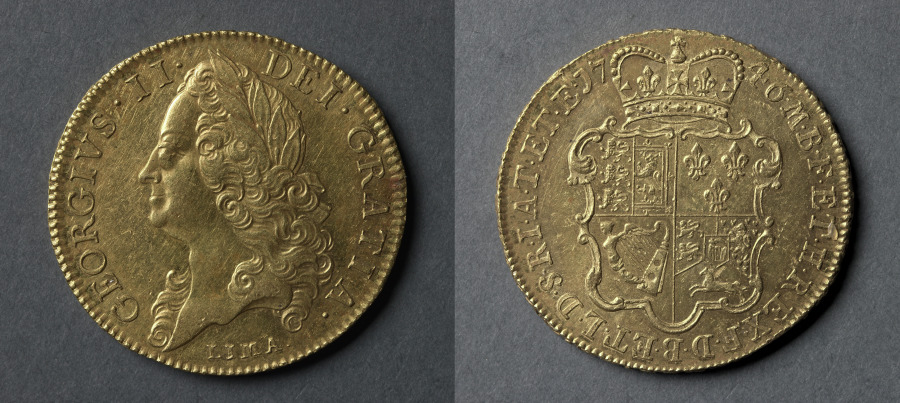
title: Five Guineas: George II (obverse); Shield of Arms (reverse)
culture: England, George II, 1727-1760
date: 1746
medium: gold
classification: Coins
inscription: DEI . GRATIA . GEORGIVS . II; below: LIMA.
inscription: M·B·F·ET·H·REX·F·D·B·ET·L·D·S·R·I·A·T·ET·E·17 46·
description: A new bust now appears on the coinage showing the king as an older man. The word LIMA that appears below the bust on this year only, refers to bullion captured by Admiral Anson from a Spanish plate fleet at Manila during his circumnavigation of the globe (1739–43). It also probably includes bullion supplied by a number of privateers operating against the Spanish plate fleets in the Atlantic. Why the actual word "Lima" was chosen to mark this supply of bullion has never been satisfactorily explained. The mint record book of the period simply records a warrant being issued for the inclusion of the word.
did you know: The crowned quartered shield of arms represents from right to left, top to bottom, a framed lion for Scotland, France with fleurs de lys, Ireland with harp, and two lions for Brunswick, among others.